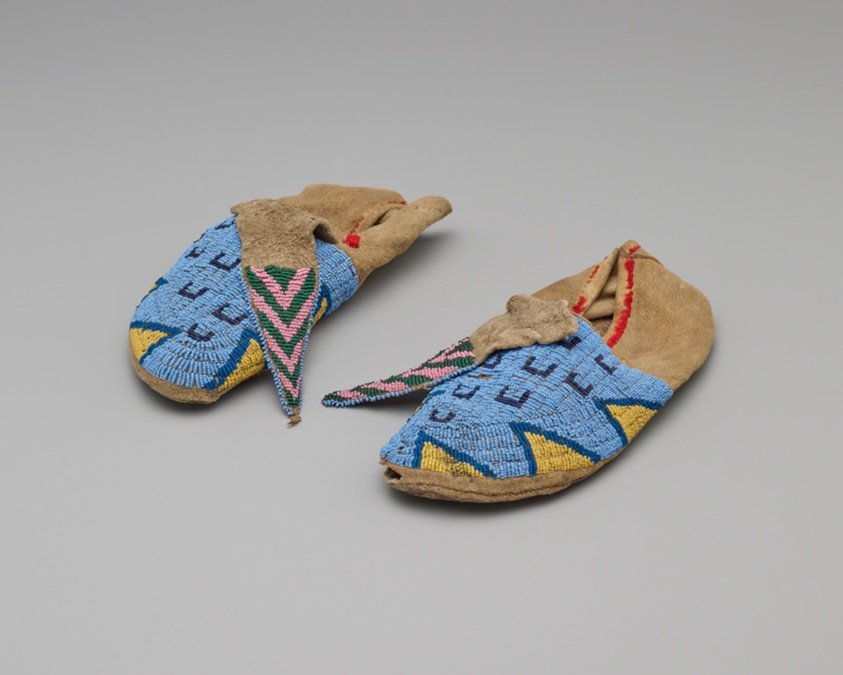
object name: Costume and Accessories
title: Man's Moccasins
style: arapaho, plains indian, native american, americas, Arts of the Americas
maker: Artist unknown (possibly Arapaho, Hinono’ei); Central Plains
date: 1885-90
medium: Leather, red yarn, and glass beads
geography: Central Plains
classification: beadwork; costume; art of the americas